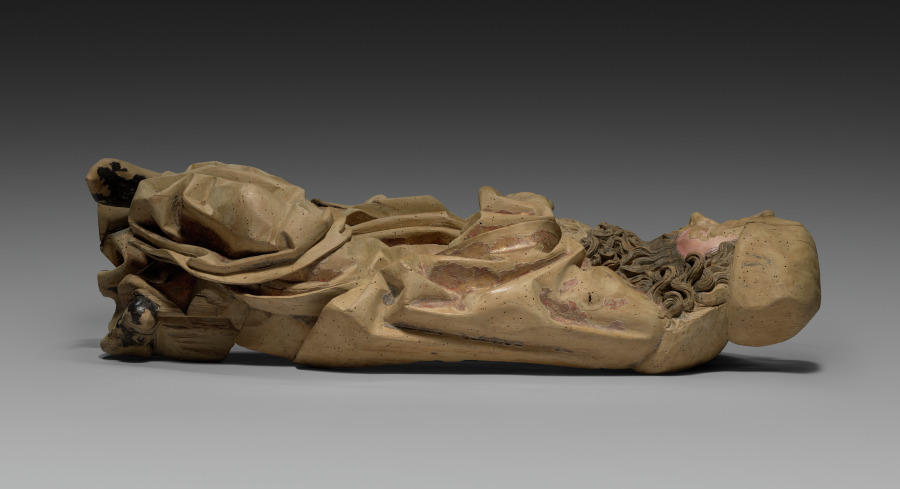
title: Jesse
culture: Germany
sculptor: Veit Stoss (German, c. 1445–1533)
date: c. 1500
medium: Limewood, polychromed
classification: Sculpture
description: The figure shows the sleeping Jesse, the father of David from the Old Testament. As the ancestor of the family tree of Christ, he was depicted in the Middle Ages sleeping as the starting point of the tree, on whose branches the ancestors of Christ are depicted. Mary with the Christ child is always shown at the top. The figure comes from a wooden altarpiece from an unknown church, possibly in Nuremberg, which is now lost. Veit Stoss is one of the most prominent German sculptors around 1500 who was mainly active in Nuremberg (Bavaria, Germany) and Krakow (Poland), also as a painter and engraver.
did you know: The family tree of Christ starts from Jesse, the father of David in the Old Testament.